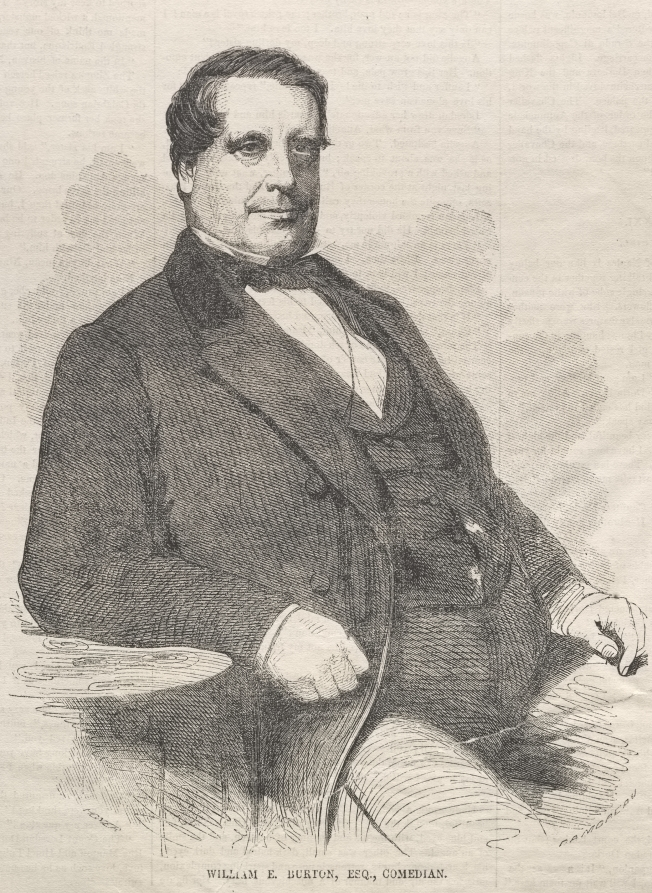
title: William E. Burton, Esq., Comedian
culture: America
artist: Winslow Homer (American, 1836–1910)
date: 1858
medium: wood engraving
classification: Print